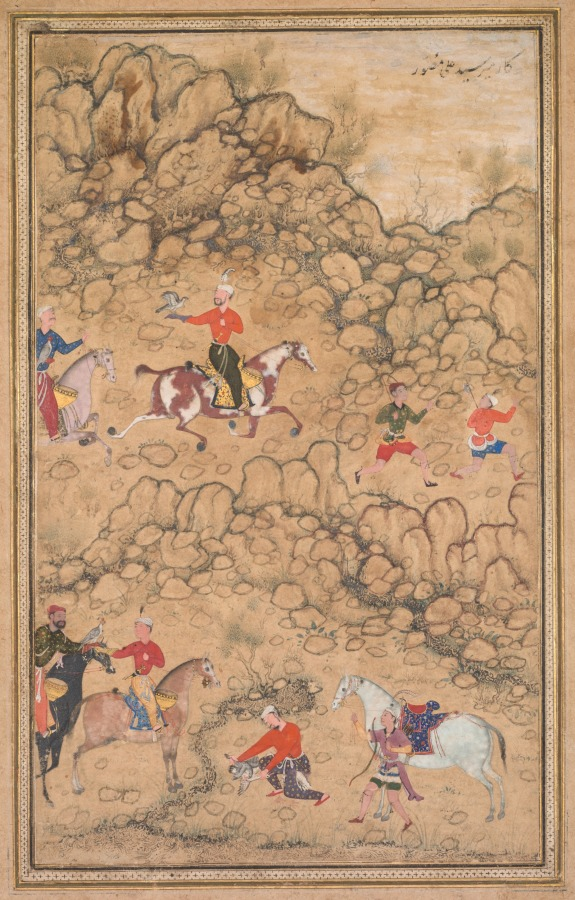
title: Hunting with falcons in a landscape (recto)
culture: Mughal India, court of Akbar (reigned 1556–1605)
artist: attributed to Abd al-Samad (Persian, c. 1510–1600)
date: c. 1558–60; borders added probably 1700s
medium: Gum tempera, ink, and gold on paper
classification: Painting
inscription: Inscription in upper right in nasta‘liq script, probably during the 1700s: the work of Mir Sayyid Ali, the illustrator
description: Mughal princes hunted on horseback with falcons. The hunting party would ride out into the wild and flush the prey from the brush. Then, its hood removed, the falcon would chase the prey and bring it down. This important work is thought to have been painted by one of the Persian artists Akbar’s father brought to India from Iran shortly after his arrival in India. The delicacy of the diminutive figures and the gently modeled rocks of the arid landscape contrast to the boldly dynamic paintings made by Indian artists.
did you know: The hunter’s glove is on the ground, as he pulls his falcon off the duck.